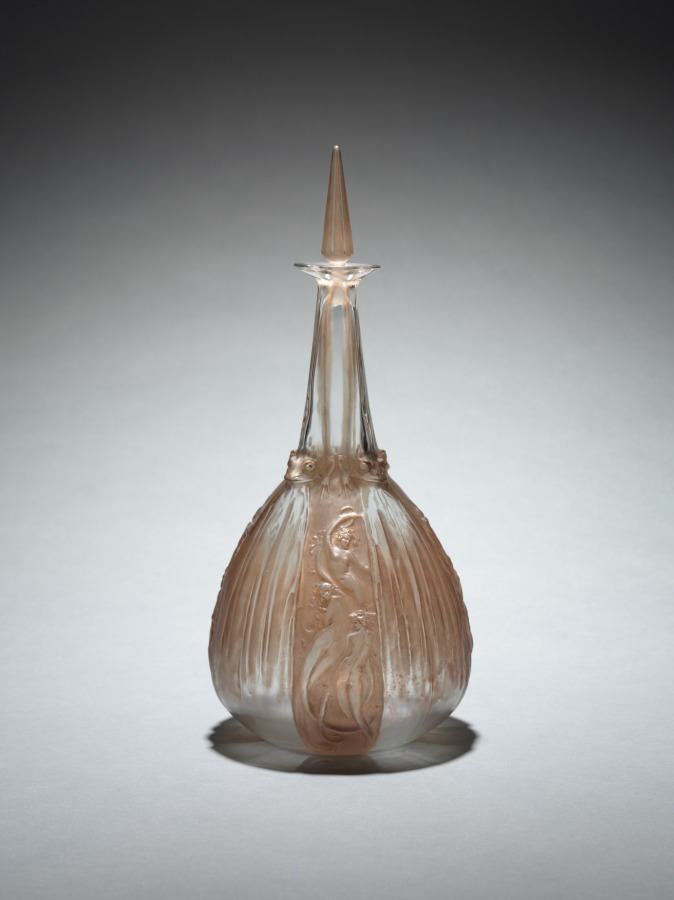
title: Mermaids and Frogs Decanter (Carafe sirènes et grenouilles)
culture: France, 20th century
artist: René Lalique (French, 1860–1945)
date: 1917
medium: glass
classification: Glass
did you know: The title of this work translates to mermaids and frogs carafe.